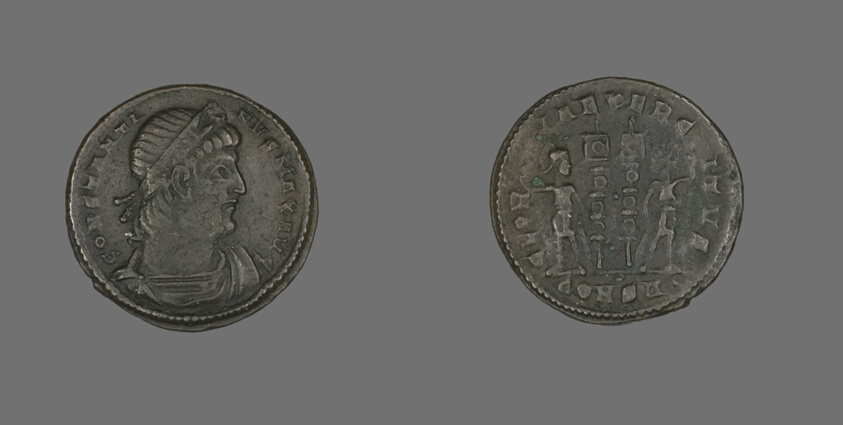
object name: Coin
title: Coin Portraying Emperor Constantine I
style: roman (ancient, style or period), ancient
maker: Roman, minted in Constantinople (now Istanbul, Turkey)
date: 333-335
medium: Bronze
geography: Roman Empire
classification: coin; ancient art